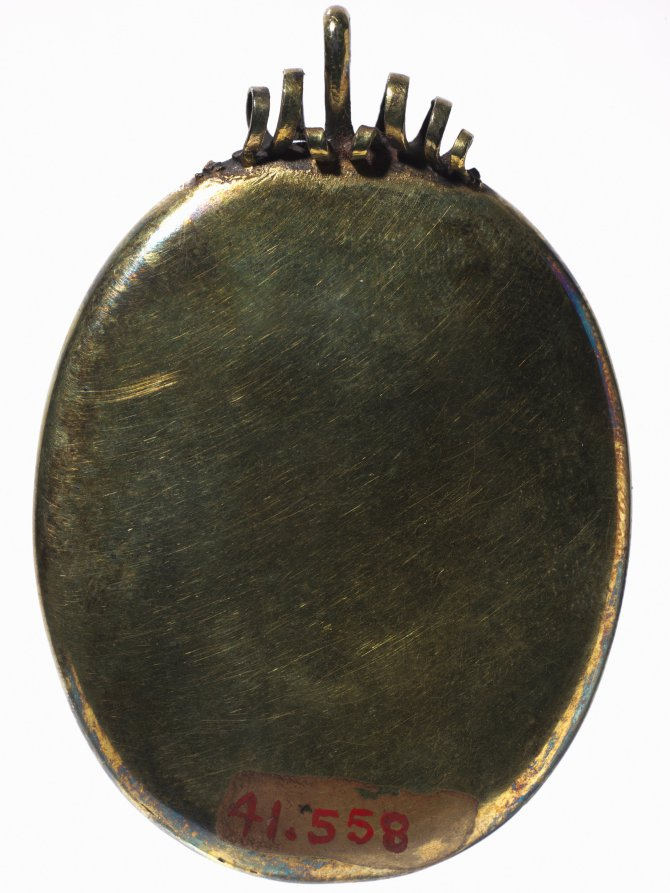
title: Portrait of a Man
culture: England, 17th century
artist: John Hoskins (British, c. 1590–1665)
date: c. 1625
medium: watercolor on vellum with gold border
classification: Portrait Miniature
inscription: signed left: IH [monogram]